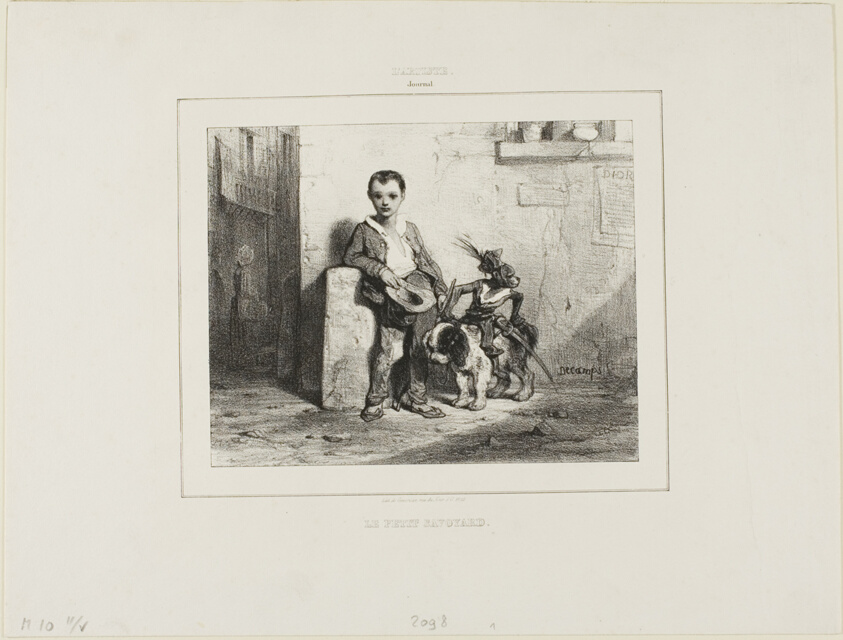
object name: Print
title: The Little Savoyard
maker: Alexandre Gabriel Decamps (French, 1803-1860)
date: c. 1825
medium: Lithograph in black on white wove paper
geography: France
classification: lithograph; print; prints and drawing